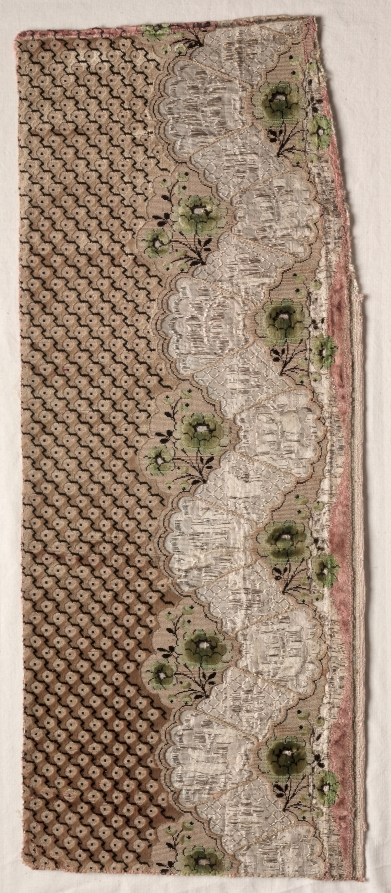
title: Textile Fragment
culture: France, late 18th century, Period of Louis XVI (1774-1793)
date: 1774–1793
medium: velvet (cut, uncut, voided, brocaded); silk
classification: Velvet